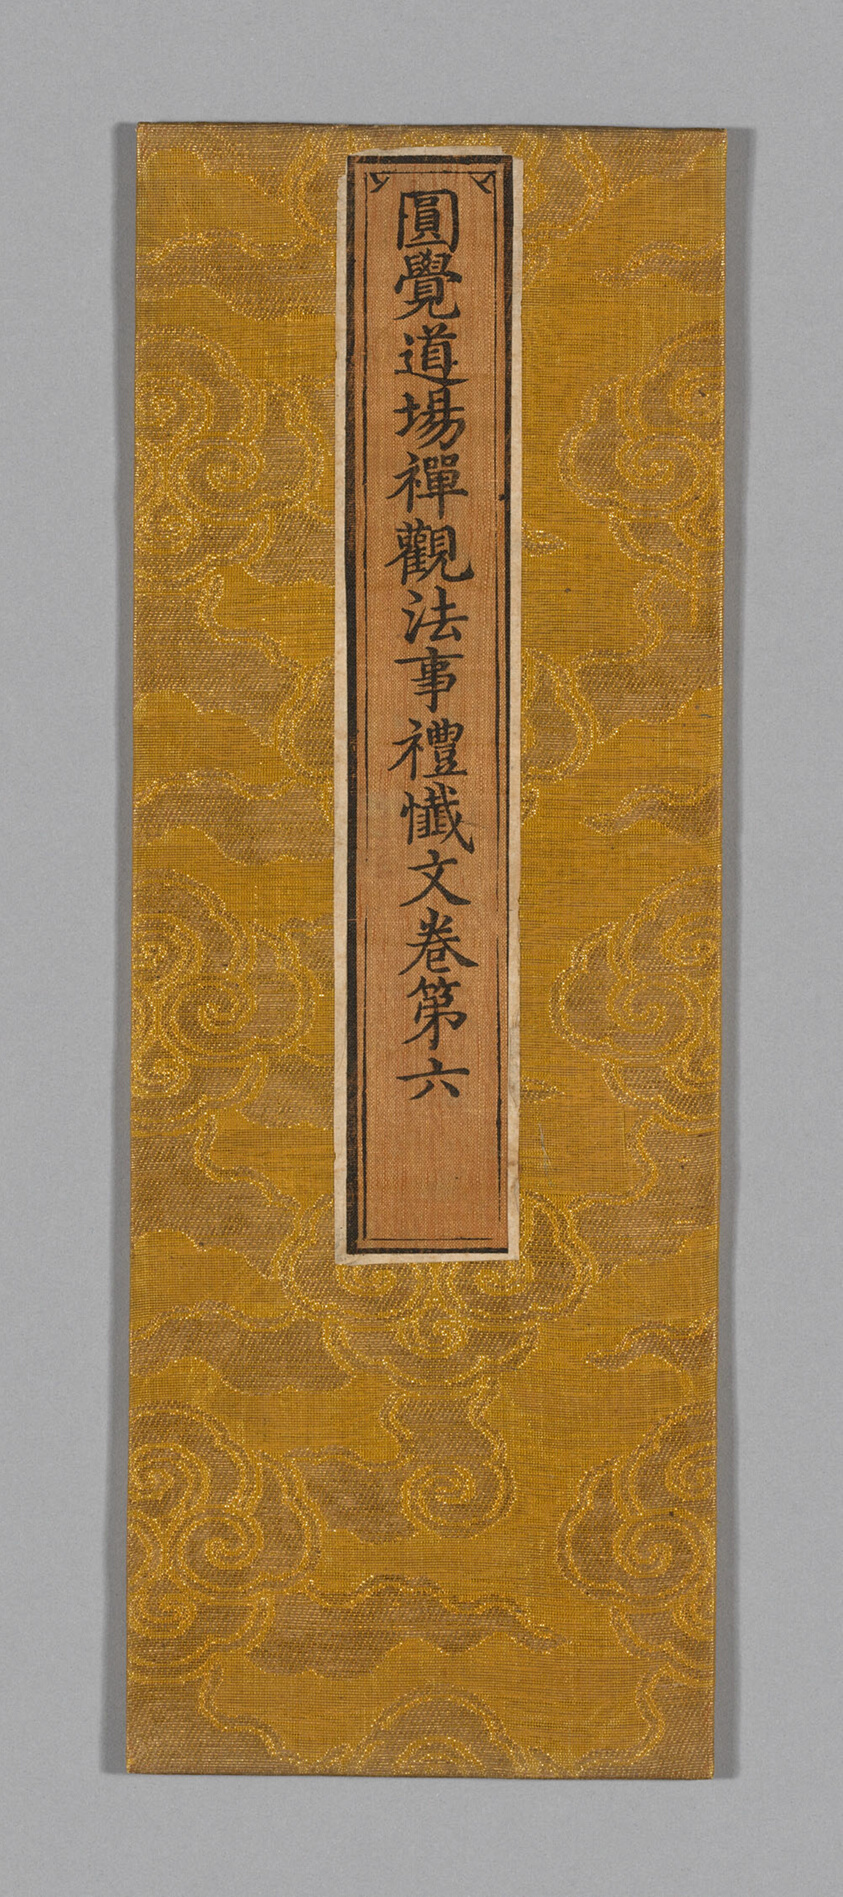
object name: Textile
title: Sutra Cover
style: ming, Chinese (culture or style), East Asian, asian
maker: China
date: Ming dynasty (1368–1644), c. 1590's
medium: Silk and gold-leaf-over-lacquered-paper strips, plain weave with supplementary patterning wefts bound in weft-float faced 1:3 'Z' twill interlacings; label: silk, plain weave; painted with ink; glued over paper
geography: China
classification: textile; weaving